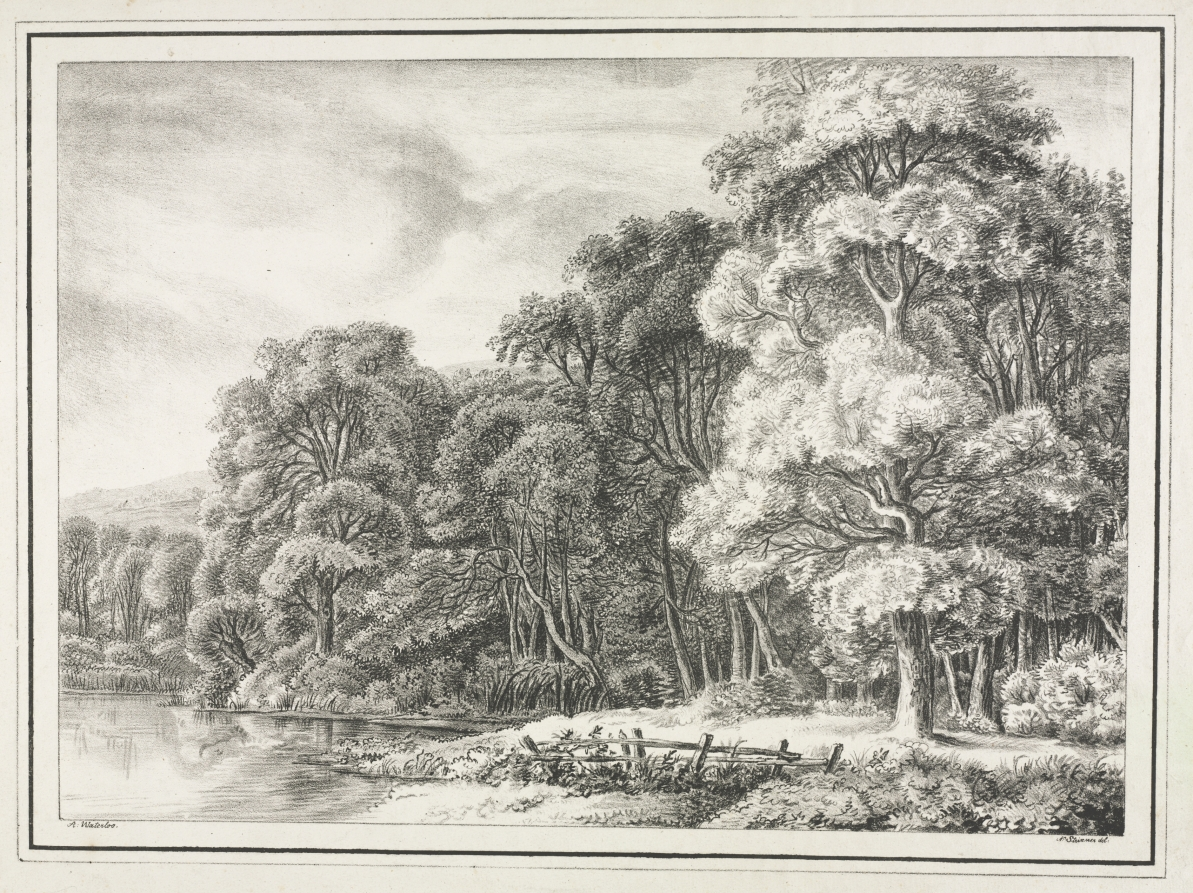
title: Woodland Scenery with Lake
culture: Germany, 19th century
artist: Johann Nepomuk Strixner (German, 1782–1855)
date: 1811–1816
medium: lithograph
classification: Print